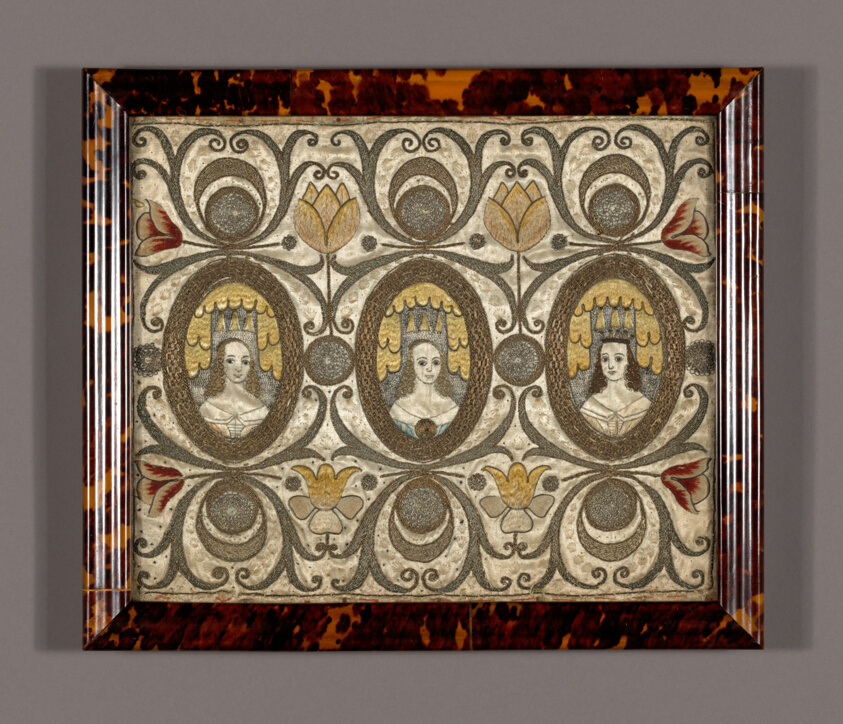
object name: Textile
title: Picture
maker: England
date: 1625/75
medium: Silk, warp-float faced 4:1 satin weave; embroidered with silk, gilt-metal purl, and gilt-metal-strip-wrapped silk in running, satin, and split stitches; couching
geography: England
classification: textile; needlework (visual works)